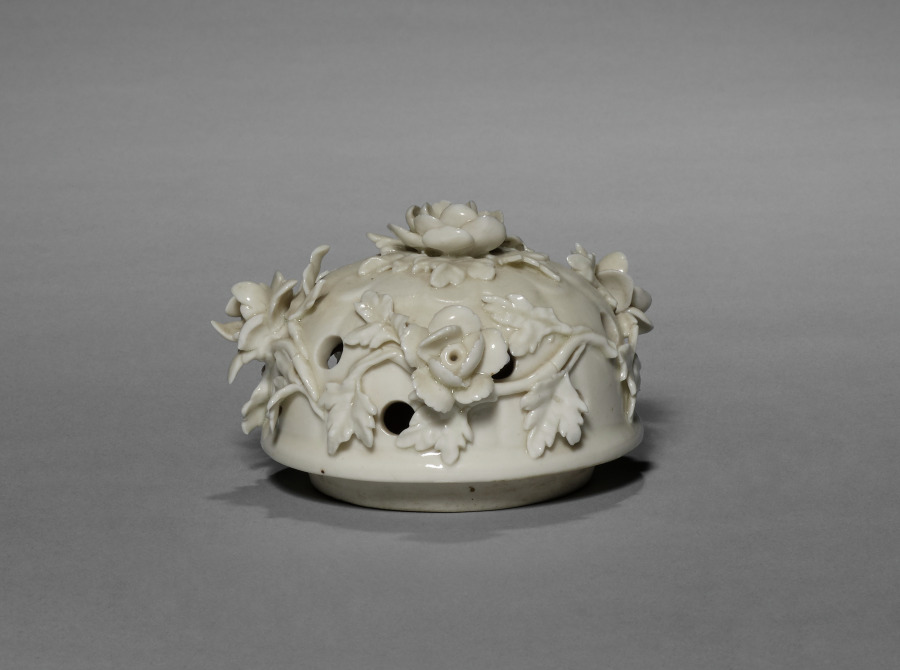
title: Potpourri Vase with Cover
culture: France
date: c. 1860–80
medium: blanc-de-chine porcelain; gilt bronze mount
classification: Ceramic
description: This vase was likely made by the celebrated Parisian ceramics firm of Edmé Samson (1810-91). To cater to the resurgence in taste for 18th-century designs, the Samson firm specialized in making reproductions of rare 18th-century European porcelains, especially those from firms that had already copied Chinese porcelains. In this case, this vase's design is taken from models produced by the St. Cloud factory in the 1750s after earlier Qing dynasty Chinese ceramics. However, the telltale sign that this vase is made by Samson and not St. Cloud is that the original would have been made from a soft-paste porcelain (fired at a lower temperature), while this example is made of hard-paste porcelain (fired at the highest temperature).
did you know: Potpourri vases always have holes in the top to let the scent of dried spices and flowers contained within freshen the air around them.